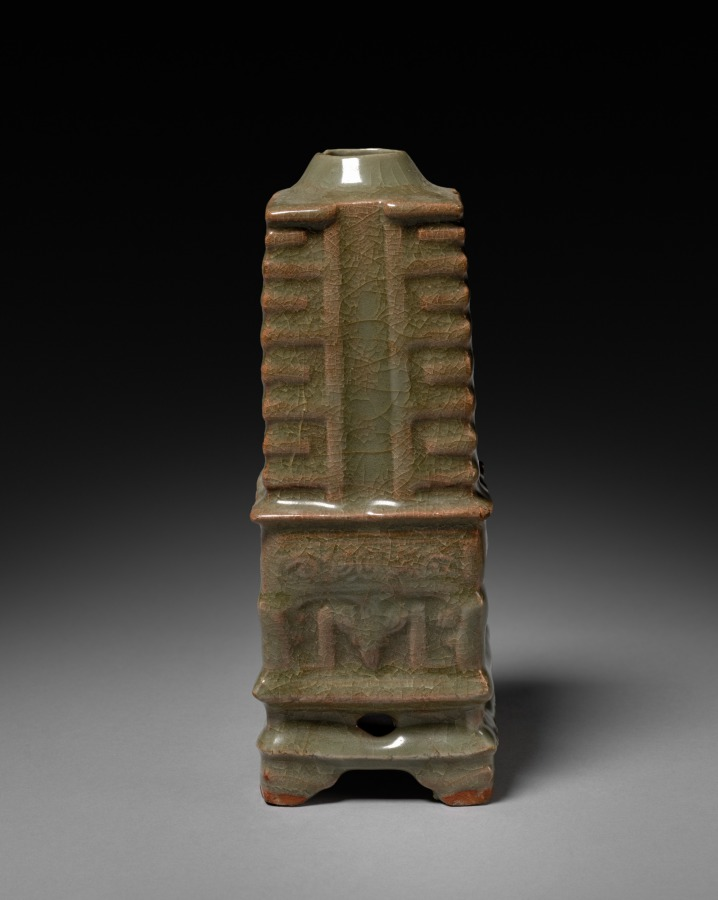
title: Vase in Shape of Cong: Southern Celadon Ware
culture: China, Zhejiang province, Yuan dynasty (1271-1368)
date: 1271–1368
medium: glazed buff stoneware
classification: Ceramic